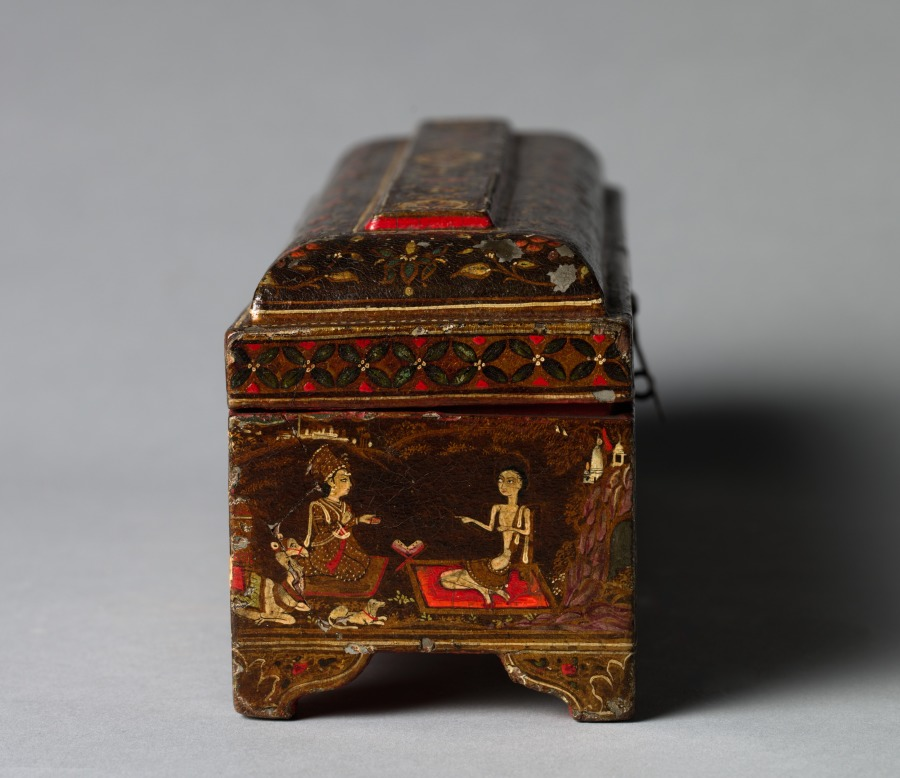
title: Rajput Box with Various Scenes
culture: India, Rajasthan, early 19th Century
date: c. 1800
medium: painted wood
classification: Painting